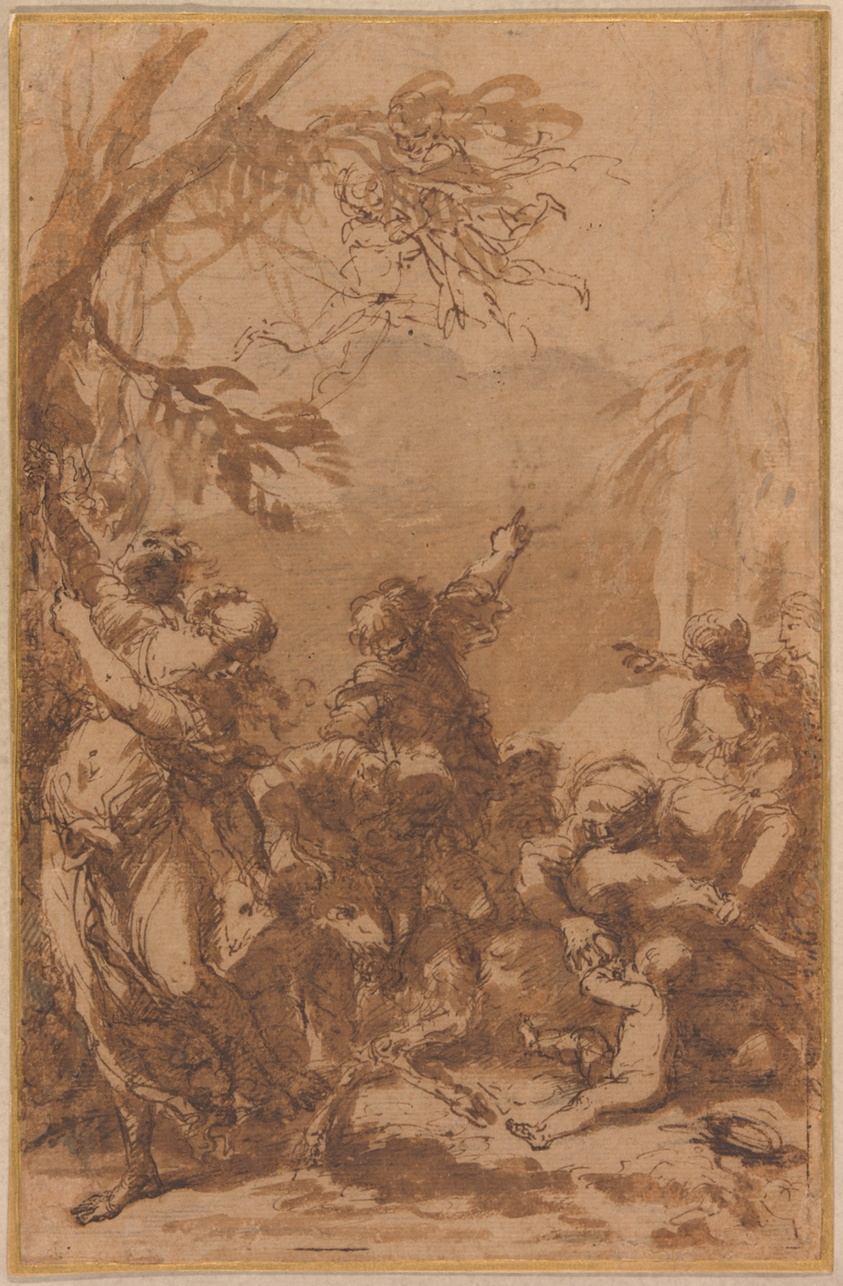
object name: Drawing and Watercolor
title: The Nurturing of Jupiter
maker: Salvator Rosa (Naples 1615–1673 Rome)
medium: Brush and brown and gray (possibly discolored) washes and pen and brown ink, over traces of black chalk, on tan laid paper; laid down on tan paper; ruled along edges in yellow metallic paint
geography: Italy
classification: brush and wash; pen and ink drawings; drawings (visual works); prints and drawing